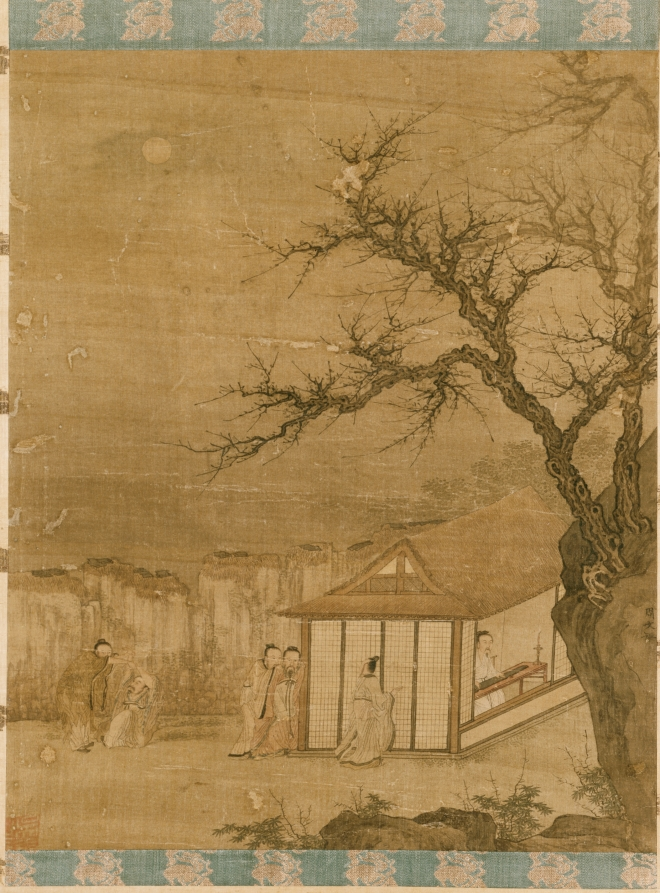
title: Listening to the Qin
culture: China, Ming dynasty (1368–1644)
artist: attributed to Tang Yin (Chinese, 1470–1523)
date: late 1400s–early 1500s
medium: hanging scroll; ink and light color on silk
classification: Painting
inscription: Artist's seal at lower left corner: Wu [remainder cut off].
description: The painting alludes to a legendary incident from the life of Ji Kang 嵇康 (AD 223–262), a guqin player who belonged to a group of 3rd-century eccentric intellectuals. Ji Kang is known as the author of a Guangling San (廣陵散; Melody from Guangling), a composition for the guqin so haunting that it aroused spirits to visit him. The painting depicts the moment when one of the spirits––disguised as a human––is helped by another to emerge from the ground, while others are drawn to the musician playing in his cottage under the full moon.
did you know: The painting is mounted in a Japanese-style three-tier format with futai.